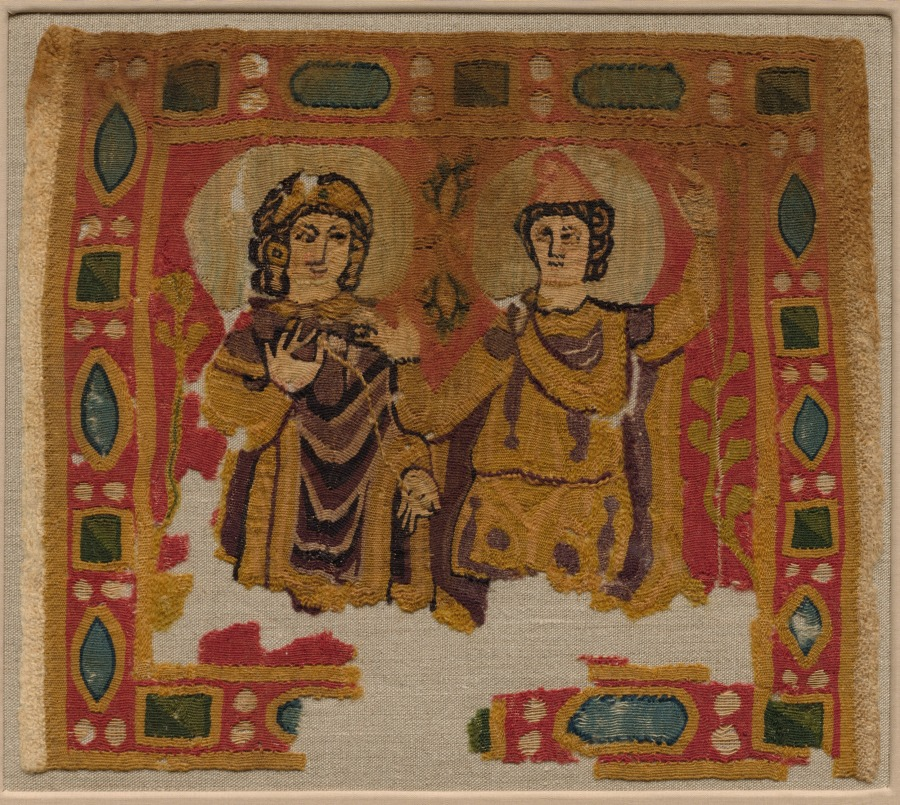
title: Two Figures Framed by a Jeweled Border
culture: Byzantine Empire (Egypt)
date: 450–550 CE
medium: wool, linen, and dye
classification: Textile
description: This weaving depicts a haloed man and woman. However, it once had a third figure at left. The textile was damaged before its 1979 acquisition; only the third figure’s partial halo and shoes remained. Staff decided to “close the gap” around the missing area and remove the shoes. While creating a “complete” image, that removal affects our ability to understand the weaving’s subject. Many questions remain: Who are the man and woman? His red cap may identify him as an “Easterner” or a freeman. Who was their missing companion? Continuing research will consider biblical and Greek mythological stories in which threads play a role.